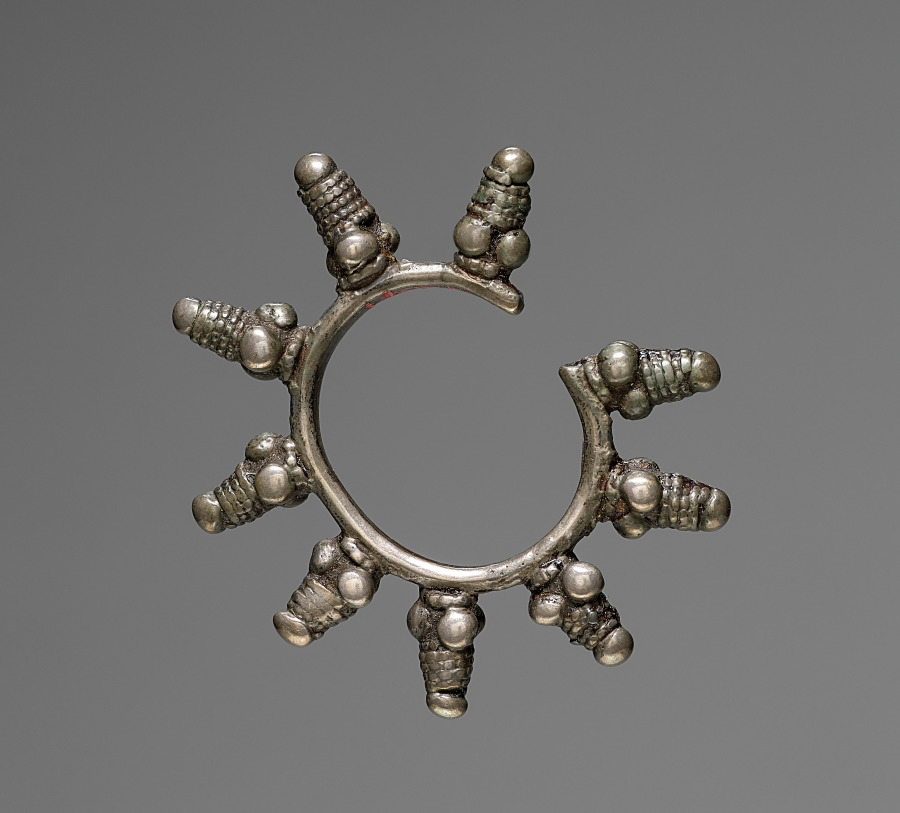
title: Earring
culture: India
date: 1800s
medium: silver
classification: Jewelry